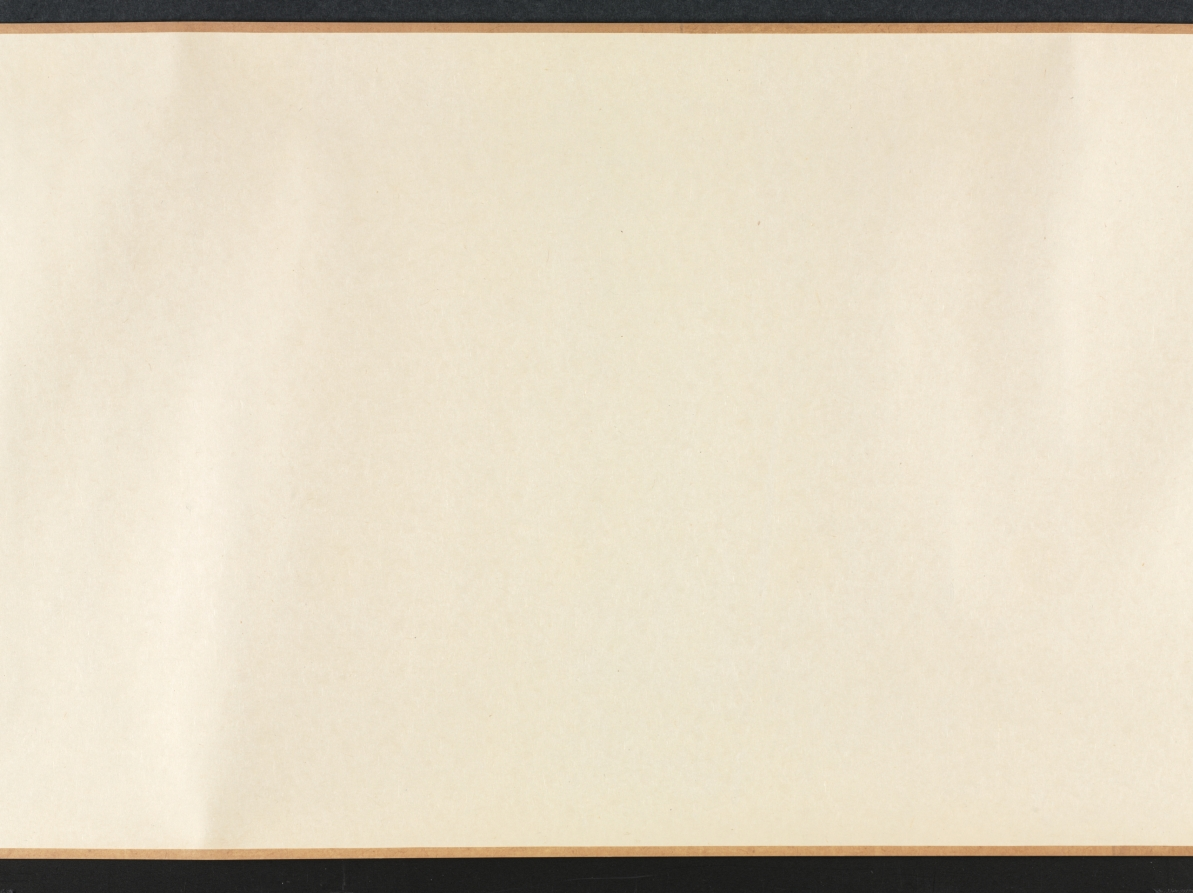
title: Hall of Lofty Pines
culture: China, Qing dynasty (1644-1911)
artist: Wang Hui (Chinese, 1632–1717)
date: 1703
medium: handscroll; ink and color on paper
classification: Painting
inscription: [題] 松喬堂圖 康熙癸未夏六月, 海虞耕煙散人王翬畫。[印]王翬之印; 石谷. [左下] 來青閣; 耕煙野老時年七十有二.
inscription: 松喬堂圖一卷，海虞石谷王君為靜海近公厲少司冦公作也。圖成于癸未之夏。未幾而公遂仙去。公令子今編修君南湖屬余題跋其後。余與公同官侍從，交契最深。側見公之清修純德，蔚為聖天子所眷重。侍直內廷，密勿贊襄，幾二十餘年。蒼生之所以受賜，士林之所以沐德者，天下莫能窺，在廷莫能悉。而公卒不言。以故宸衷日益契，恩禮亦日益渥。雖年逾懸車，時有歸老之念。而上固不聼公之去。其所謂松喬堂者，御書以賜公者也。蓋以松比公之清風勁節，而歲寒不改，經霜彌茂。則又以期公之壽考未有艾焉。公知此身未易乞，而山林槃磵之樂，止可寄諸寤思。此松喬堂圖之所由作也歟。石谷此圖，結構精密，筆墨超邁。其寫樹木之蒼蔚，堂宇之靚幽。恍見摩詰輞川樂天廬山之勝。獨惜公未得一日徜徉故園以償其願。即繪於圖亦未得以永其趣，此編修君之所以眷眷不忘也。雖然千歳之松喬，下蔭百畝，上以修棟梁之需。然則上當日名堂之意，不更望於後之人襲其芘而養其材也哉。吾願編修君之寶斯圖。并望君之塗塈丹雘，大其堂構也已矣。 康熈丙戍重陽三日，雲間王鴻緒跋。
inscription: 10 additional seals: 1 seal of Li Duna 勵杜納 (1628–1703); 4 seals of Zha Ying 查瑩 (jinshi of 1766); 5 seals of Li Yun (dates unknown).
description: Wang Hui 王翬, a leading painter in the orthodox school of the early Qing dynasty (1644–1911), was commissioned to paint this landscape with a country estate for Li Duna 勵杜納 (1628–1703), vice minister of justice in Emperor Kangxi’s court. The emperor had honored Li by granting him a piece of calligraphy with the name of Li’s retirement retreat, “Hall of Lofty Pines.” He drew a comparison between pines and Li’s upright character, resilience, and longevity. Wang Hui’s painting was supposed to allow Li to imagine living in a beautiful, secluded compound among the hills and pines. Sadly, Li died before seeing the completed painting and before receiving the emperor’s permission to retire. The landscape begins with peaceful riverbanks and low hills. The pines around the estate in the middle of the handscroll are truly lofty, some stretching even beyond the frame of the painting. Li Duna, the estate’s owner, is shown twice in his serene mountain retreat: first approaching the entrance to the compound with two servants at the right, and then later in the scroll, to the left, reading in the comfort of an inner room.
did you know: One servant carries the estate owner's carefully wrapped qin, a type of zither.